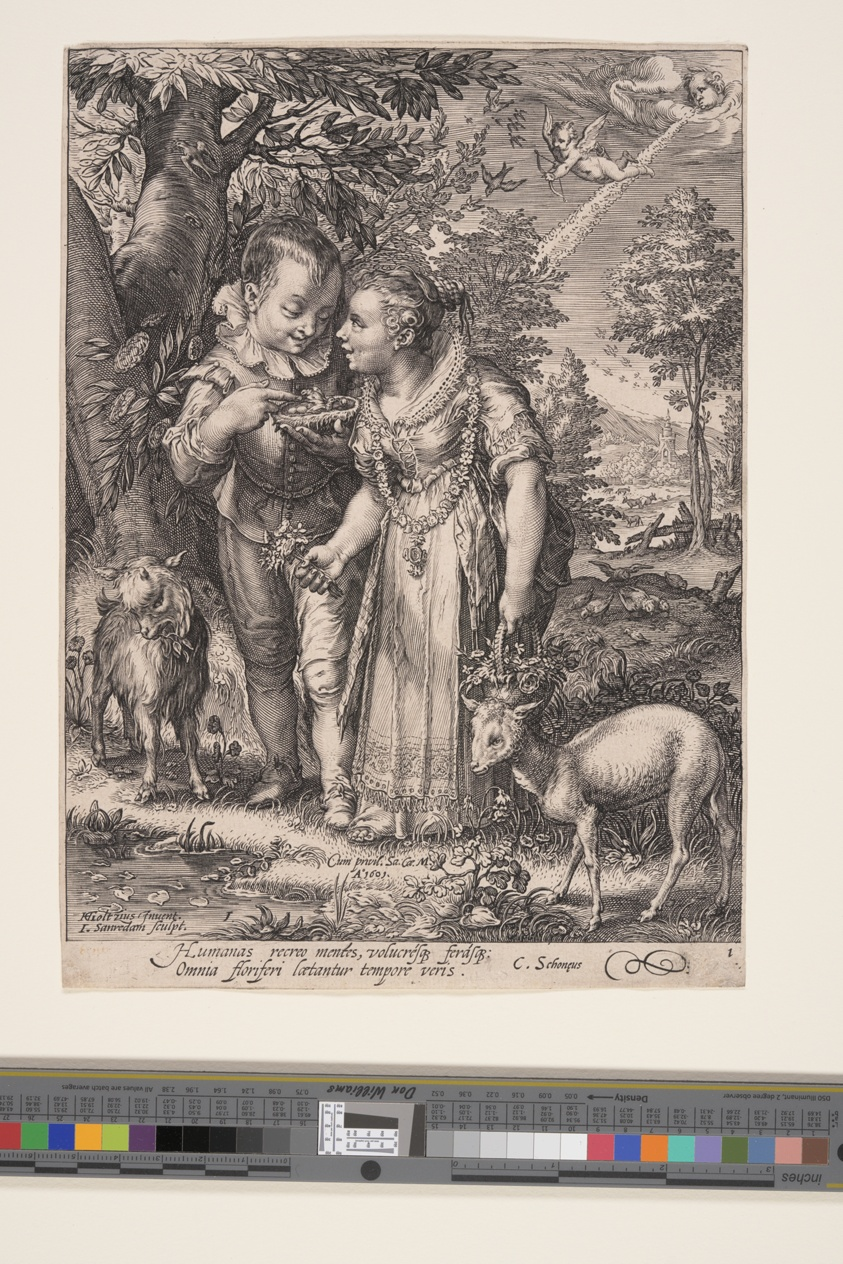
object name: Print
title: Spring (Two Children Playing with Bird), from The Four Seasons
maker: Jan Saenredam (Dutch, 1565–1607); after Hendrick Goltzius (Dutch, 1558–1617)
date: 1601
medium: Engraving on laid paper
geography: Netherlands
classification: print; engraving; paper; prints and drawing